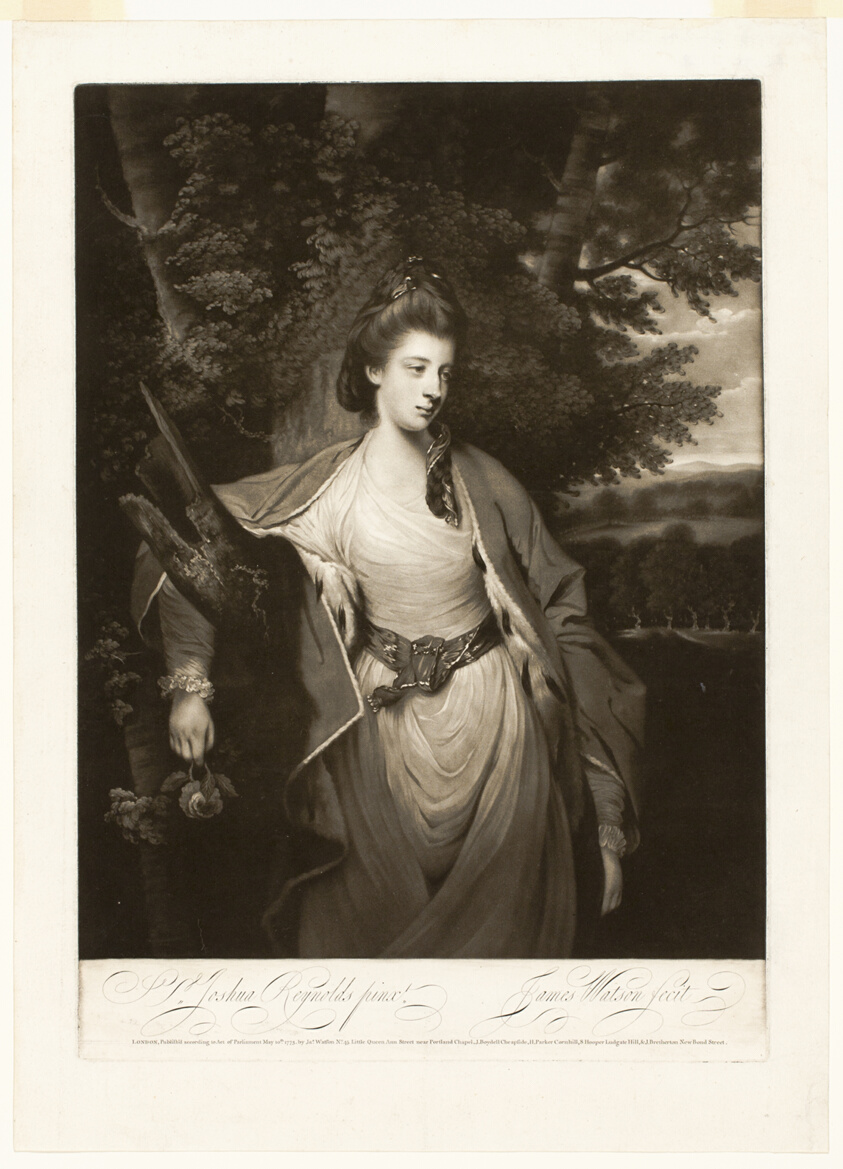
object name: Print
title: Margaret, Countess of Carlisle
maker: James Watson (Irish, c. 1740-1790); after Sir Joshua Reynolds (English, 1723-1792)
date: May 10, 1773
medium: Mezzotint with engraving in black on ivory laid paper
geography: Ireland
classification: mezzotint; print; prints and drawing